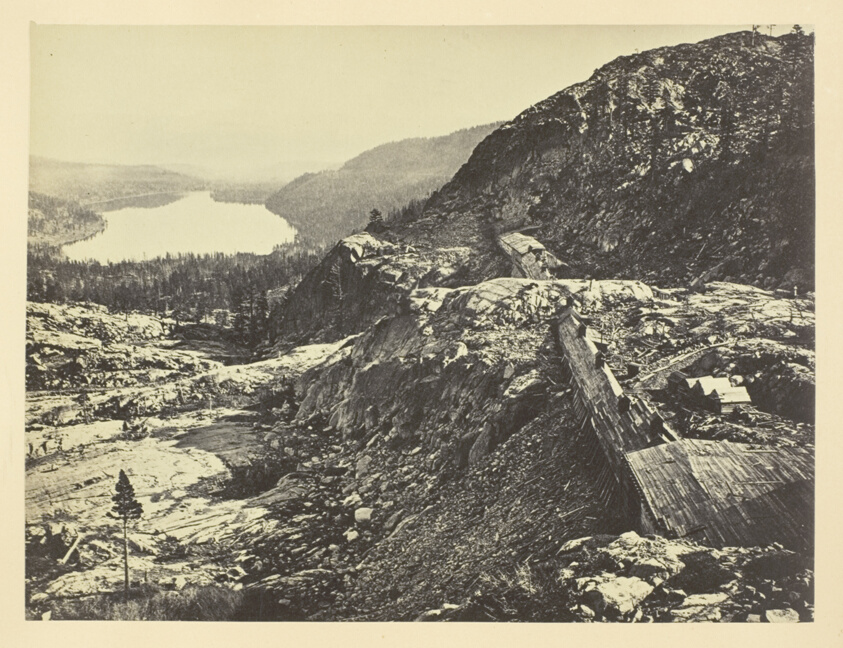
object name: Photograph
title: Summit of Sierra Nevada, Snow Sheds in Foreground, Donner Lake in the Distance, C. P. R. R.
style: 19th century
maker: Andrew J. Russell; American, 1830–1902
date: 1868/69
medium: Albumen print, pl. XXIX from the album "Sun Pictures of Rocky Mountain Scenery" (1870)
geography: United States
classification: photograph; albumen silver print; photography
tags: Collected by Hugh Edwards